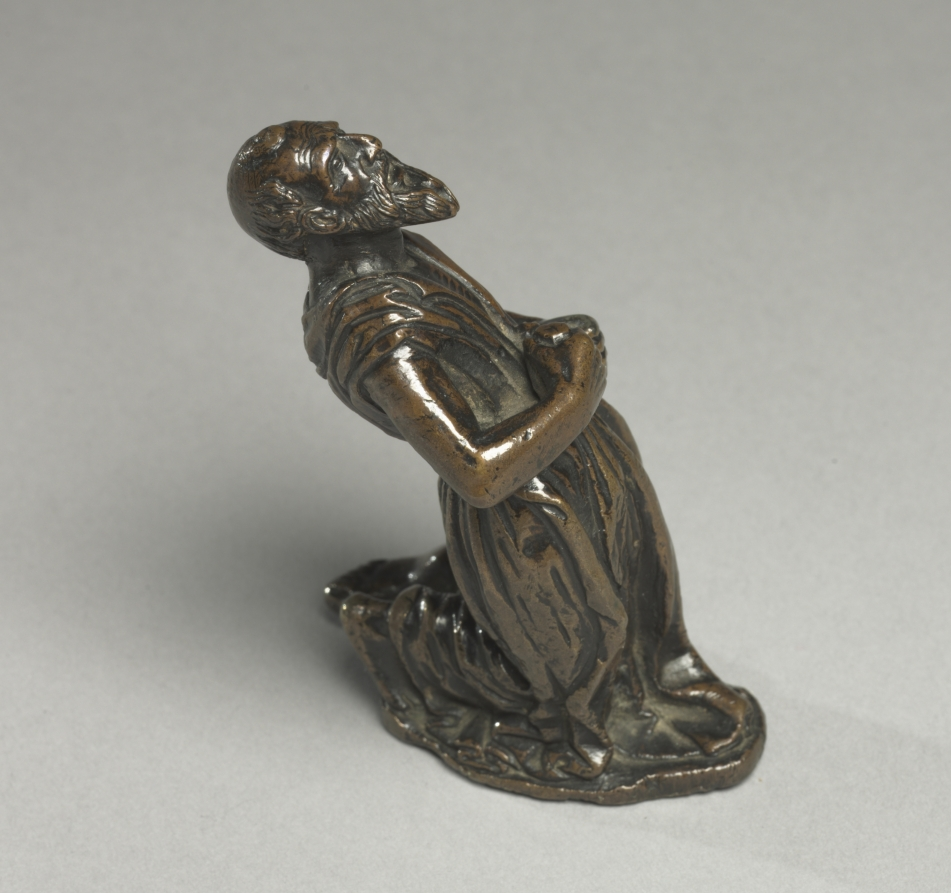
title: Kneeling Saint Jerome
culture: Italy, Ravenna, 16th century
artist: workshop of Severo da Ravenna (Italian, c.1496–c.1543)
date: c, 1525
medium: bronze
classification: Sculpture